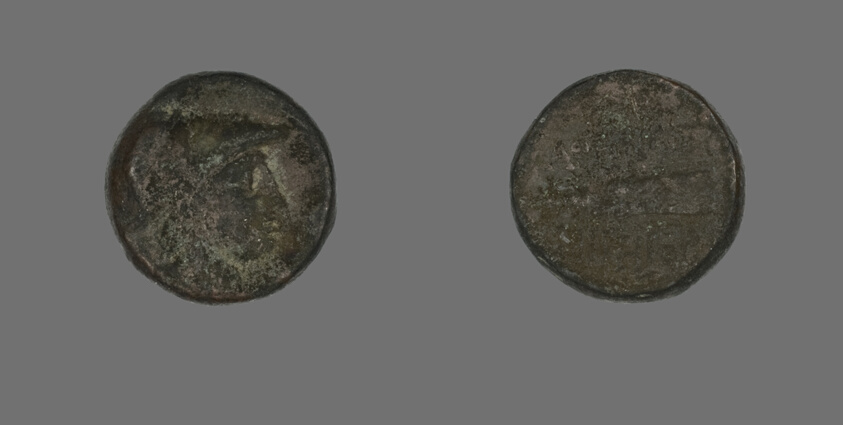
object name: Coin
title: Coin Depicting the Goddess Athena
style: greek, ancient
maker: Greek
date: 200-133 BCE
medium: Bronze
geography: Ancient Greece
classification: coin; ancient art